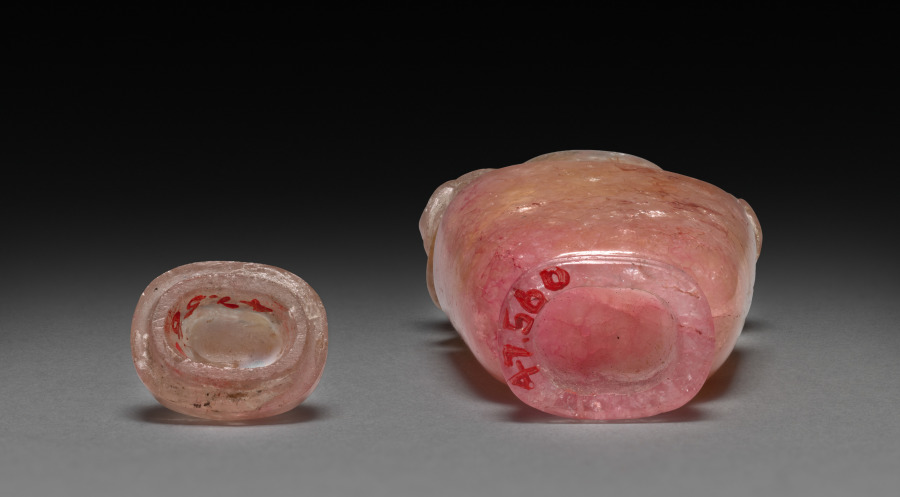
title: Miniature Jar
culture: China, Qing dynasty (1644-1911)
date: 19th-early 20th century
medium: jade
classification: Jade